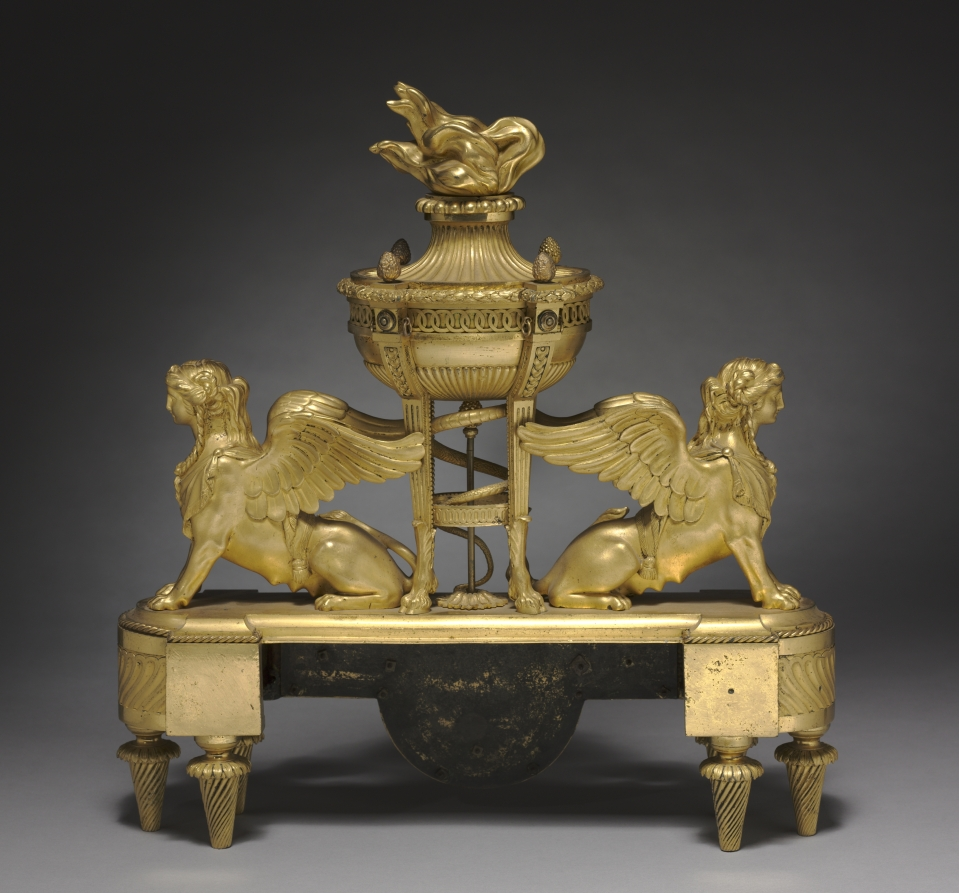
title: Firedog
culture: France, 18th century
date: c. 1785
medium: gilt bronze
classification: Furniture and woodwork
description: Although Louis Jean Desprez’s design was largely inspired by tombs in southern Italy, he added sphinxes in his print Tomb with Sphinx due to his fascination with ancient Egypt. Ancient Egyptians saw the sphinx, a half-human, half-lion mythological creature, as a protector of tombs and temples. The pair of andirons, decorative supports for a hearth’s firewood, alongside Tomb with Sphinx, highlight the growing interest in Egyptomania during the 1700s. Interestingly, the andirons portray ancient Greek and Roman interpretations of the sphinx. Most Europeans learned of ancient Egypt by studying Egyptomania in ancient Roman and Greek art and architecture or Egyptian antiquities brought over by the Romans.